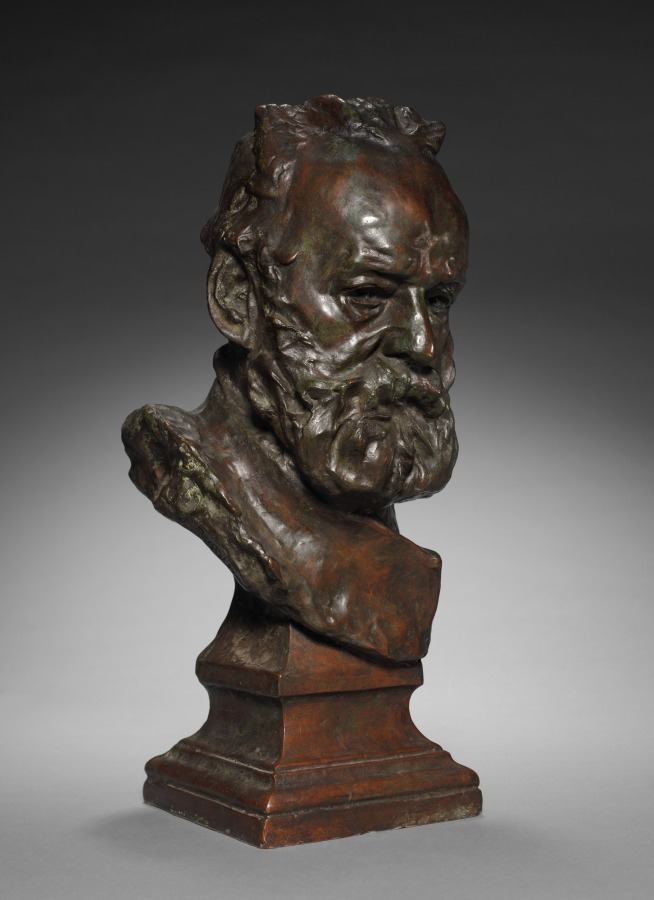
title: Bust of Victor Hugo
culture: France, 19th century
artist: Auguste Rodin (French, 1840–1917)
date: 1883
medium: bronze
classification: Sculpture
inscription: Signed beneath fold of drapery to left: "A. Rodin"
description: Unlike most of Rodin’s portraits, the bust of Victor Hugo (1802–1885) was made from memory because the famous French writer refused to sit for the artist. Among Hugo’s best-known novels are The Hunchback of Notre Dame (1831) and Les Misérables (1862).